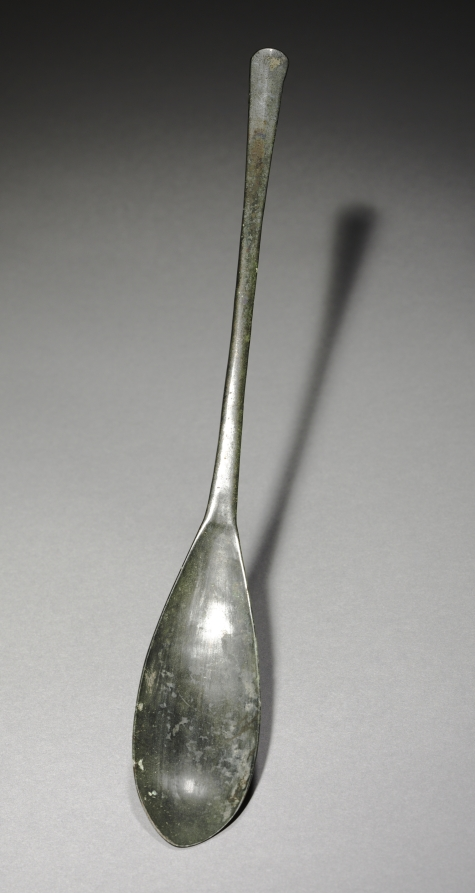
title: Spoon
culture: Korea, Goryeo dynasty (918–1392)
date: 918–1392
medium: silver bronze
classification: Metalwork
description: Celadons, spoons, seals, and bronze mirrors were the most common burial objects in tombs during the Goryeo Dynasty (918-1392). Furnishing tombs with an elaborate assemblage of objects was believed to honor and comfort the tomb occupant. Generally, Goryeo tombs were left untouched until the late nineteenth century. During the colonial period (1910–45), however, Japanese archaeologists hastily excavated the tombs located in Kaeseong, the former capital of the Goryeo Dynasty. Scholars recently have proposed that toward the end of the 14th century, Koreans enjoyed meat-based soups more than any other dishes, explaining why much more spoons than chopsticks were buried in tombs.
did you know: Bronze spoons are the most common burial item. Scholars have proposed that toward the end of the 14th century, Koreans enjoyed meat-based soups more than any other dishes, explaining why spoons became common household items as well as burial goods.